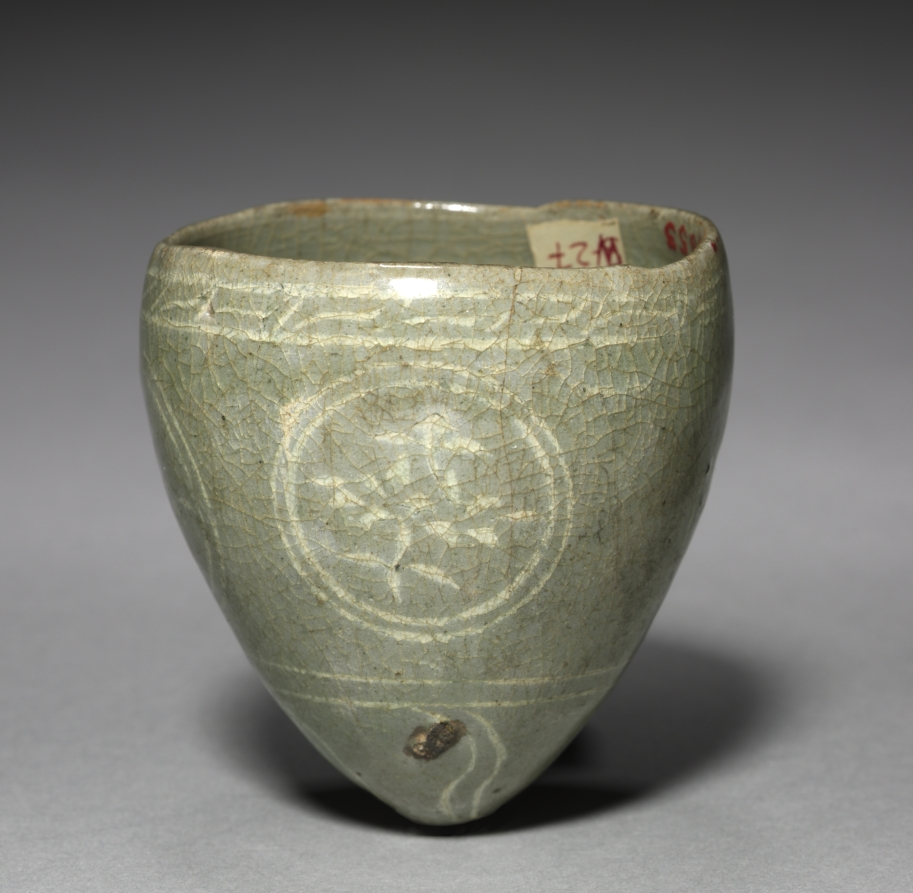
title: Cup with Inlaid Chrysanthemum Design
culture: Korea, Goryeo dynasty (918–1392)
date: 1200s-1300s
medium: pottery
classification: Ceramic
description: Toward the late 14th century, the overall quality of techniques involved in making celadon works sharply deteriorated. In contrast to translucent greenish blue celadon works of the 12th century, this drinking cup possibly dated to the late 14th century, has gray greenish glaze. And its inlaid design also shows a clear sign of decline in craftsmanship. Nevertheless, less attention to techniques gave a way to a freer style of pottery called buncheong in the succeeding centuries.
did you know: This distinctively shaped cup with a pointy base is known to have been used on horseback.